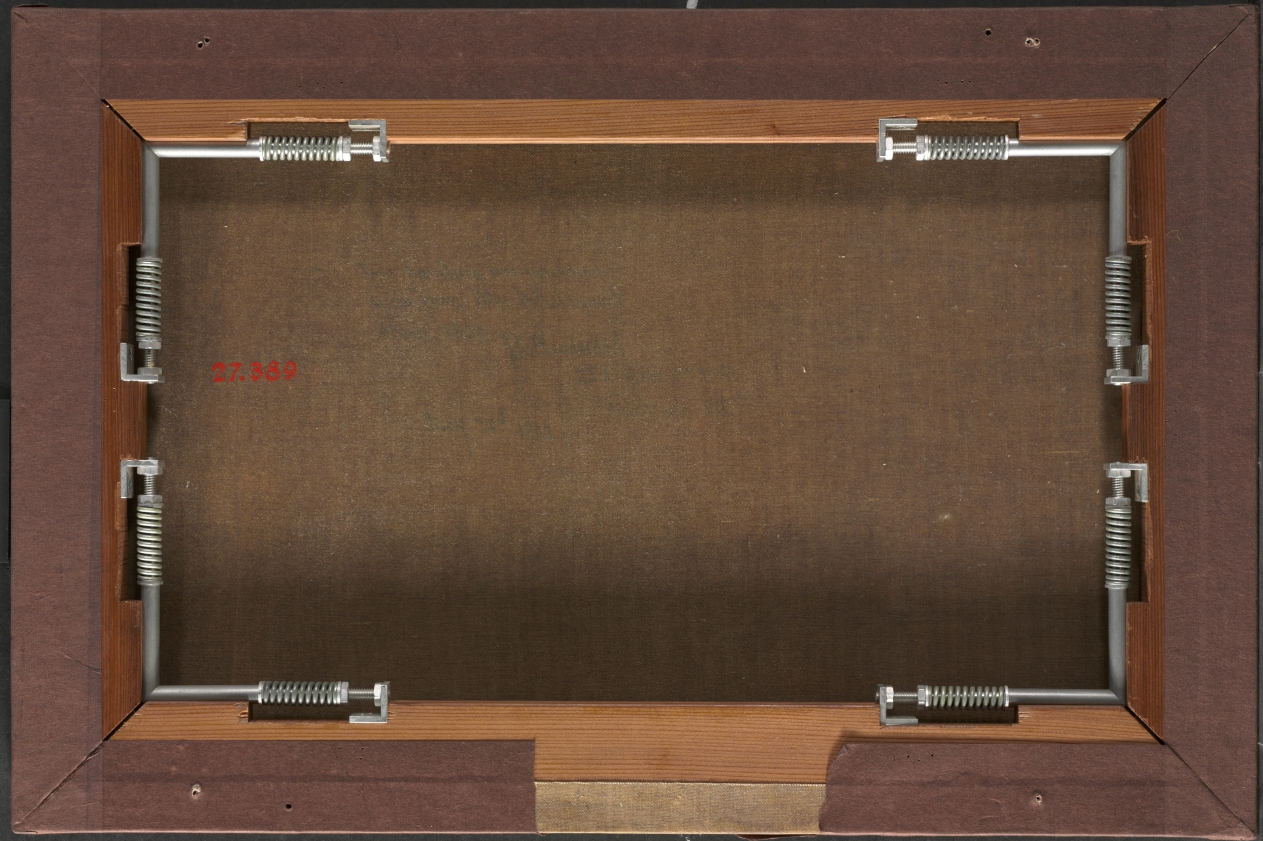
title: Arkville Landscape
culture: America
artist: Alexander H. Wyant (American, 1836–1892)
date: 1880s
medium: oil on canvas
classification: Painting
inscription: Signed lower left: "A.H. Wyant"